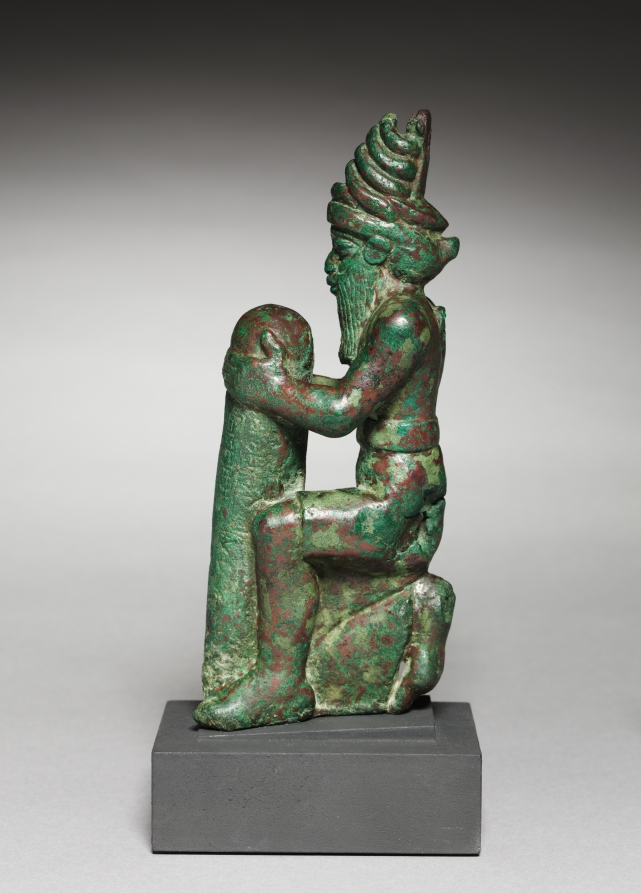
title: "Foundation Nail" of Gudea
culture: Mesopotamia, Neo-Sumerian, Iraq, probably Lagash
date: c. 2100 BCE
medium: copper alloy, lost-wax cast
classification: Sculpture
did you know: The ruler Gudea placed one of these special nails in every temple he built in order to commemorate it.